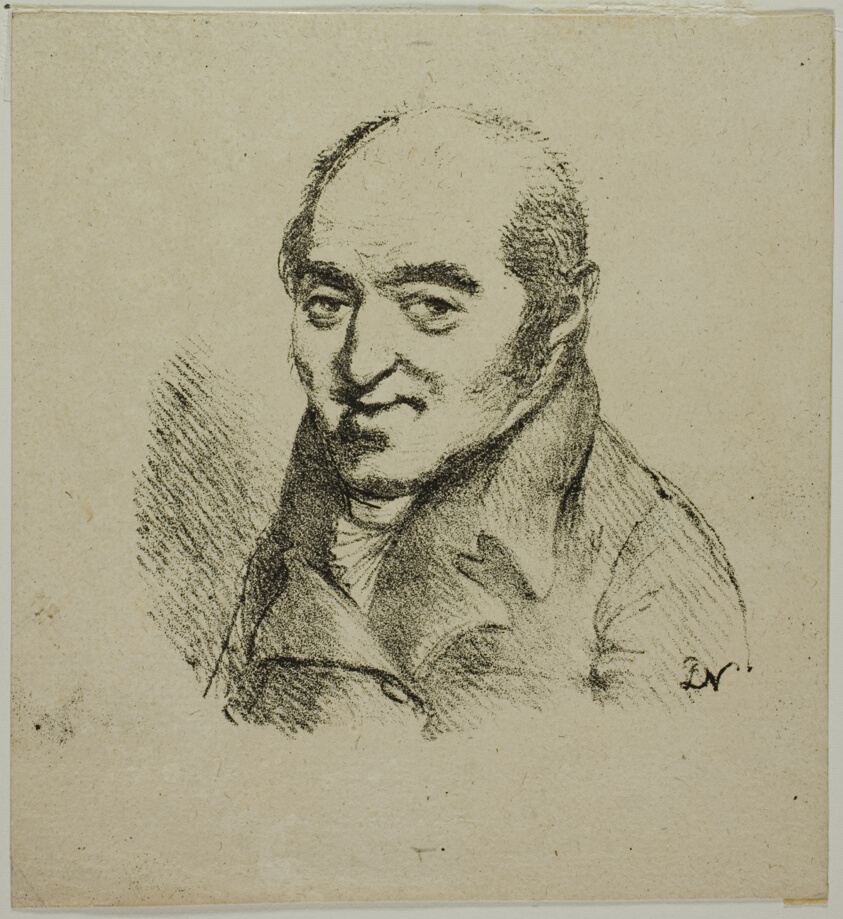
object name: Print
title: Portrait of Samuel Rogers, English Poet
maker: Dominique-Vivant Denon (French, 1747-1825)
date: 1816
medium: Lithograph in black on cream laid paper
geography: France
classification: lithograph; print; prints and drawing